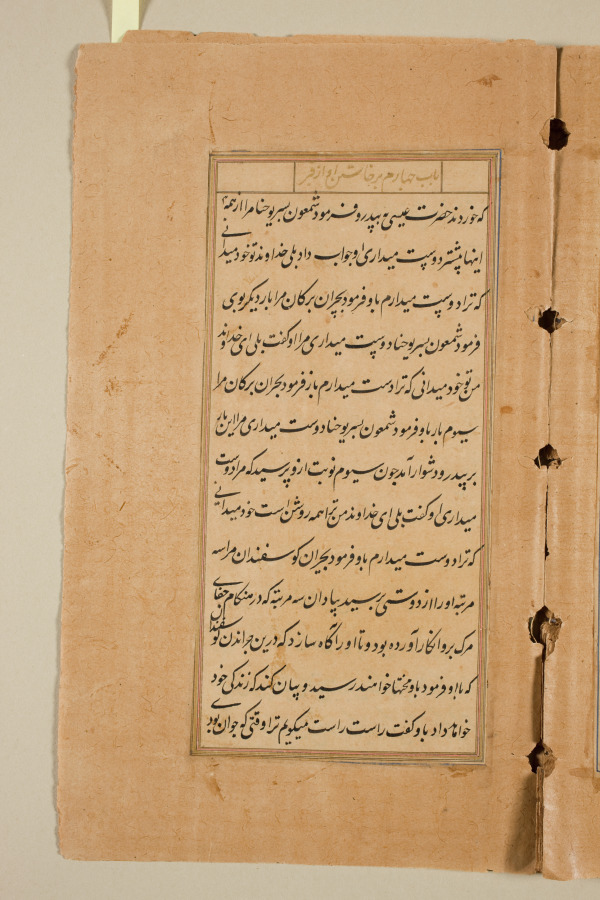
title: Text page from a Mirror of Holiness (Mir’at al-quds) of Father Jerome Xavier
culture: Mughal India, Allahabad, made for Prince Salim (1569–1627)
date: 1602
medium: Ink and gold on paper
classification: Manuscript